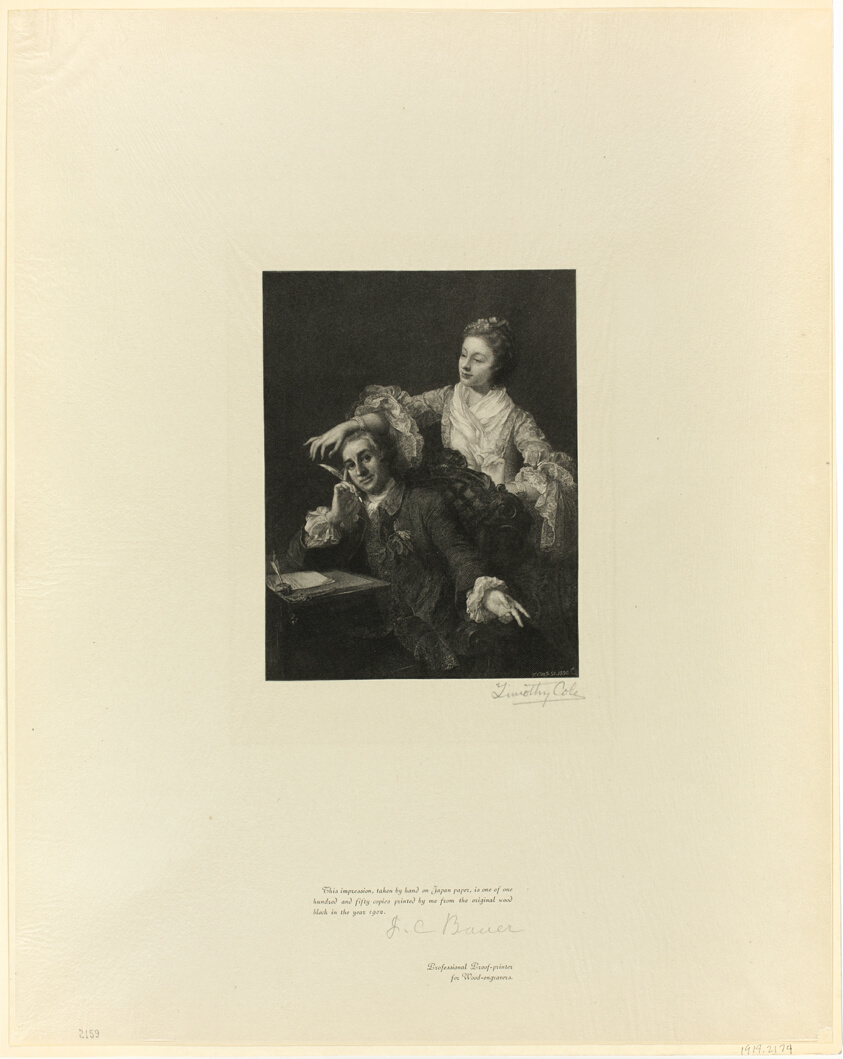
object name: Print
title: Garrick and his wife, from Old English Masters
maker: Timothy Cole (American, born England, 1852-1931); after William Hogarth (English 1697-1764)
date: 1897, printed 1902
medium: Wood engraving on chine paper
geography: United States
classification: wood engraving; print; prints and drawing